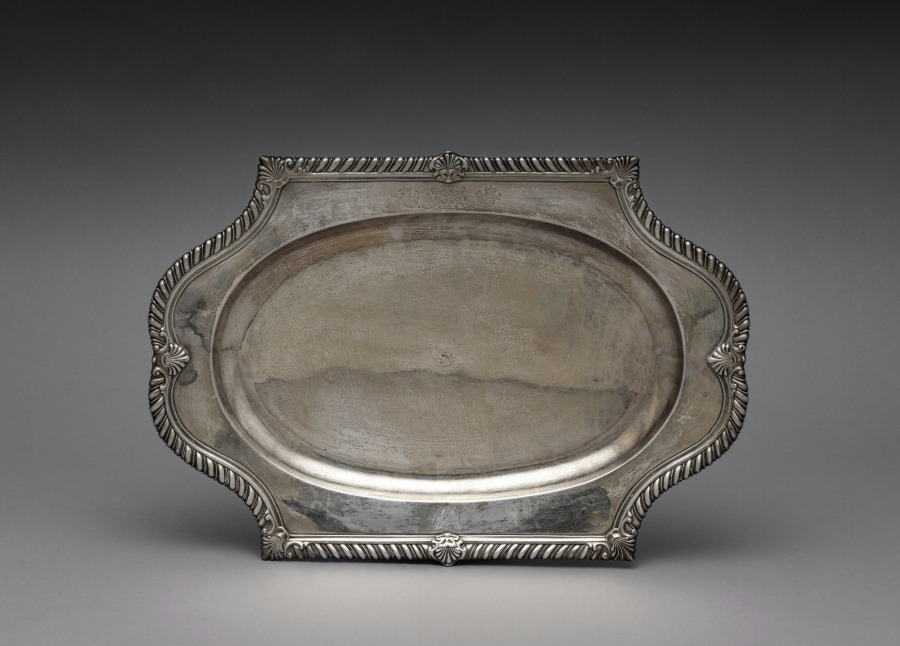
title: Tray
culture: England, 18th century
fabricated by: Paul Jacques de Lamerie (British, 1688–1751)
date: 1745–1746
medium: silver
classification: Silver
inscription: Scratched underside: "No 4.", "41 = 0 1/2".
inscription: Two crests engraved on either side of face: A lion and the other states, "Tout Est Vanite".